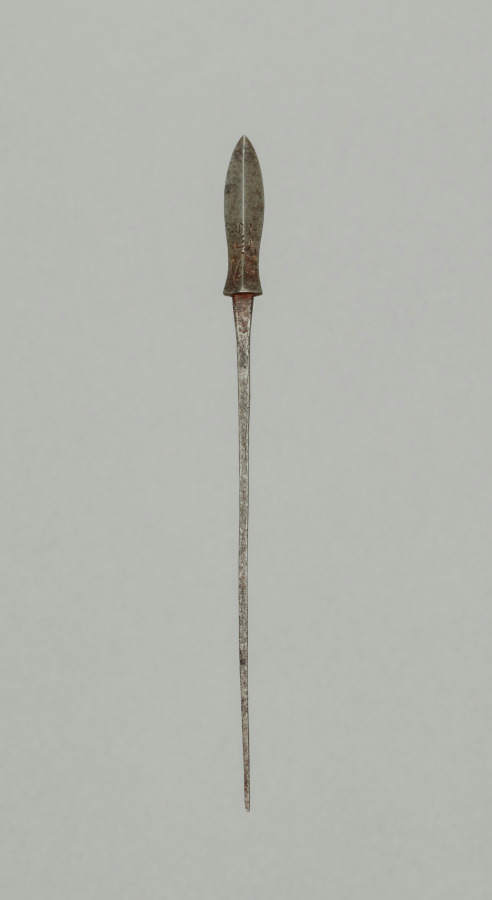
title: Arrow Point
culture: Japan, Edo period (1615–1868)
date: 1700s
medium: steel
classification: Arms and Armor